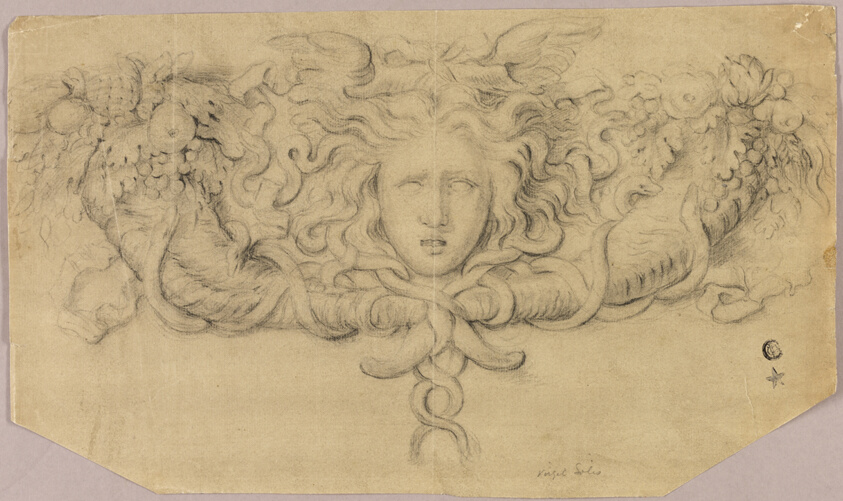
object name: Drawing and Watercolor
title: After Carving with Medusa Head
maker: Virgilius Solis, the Elder (German, 1514-1562); or Unknown artist (French, 1500-1599)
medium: Black chalk and charcoal on dark tan toned ivory laid paper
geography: Germany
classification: chalk; drawings (visual works); prints and drawing